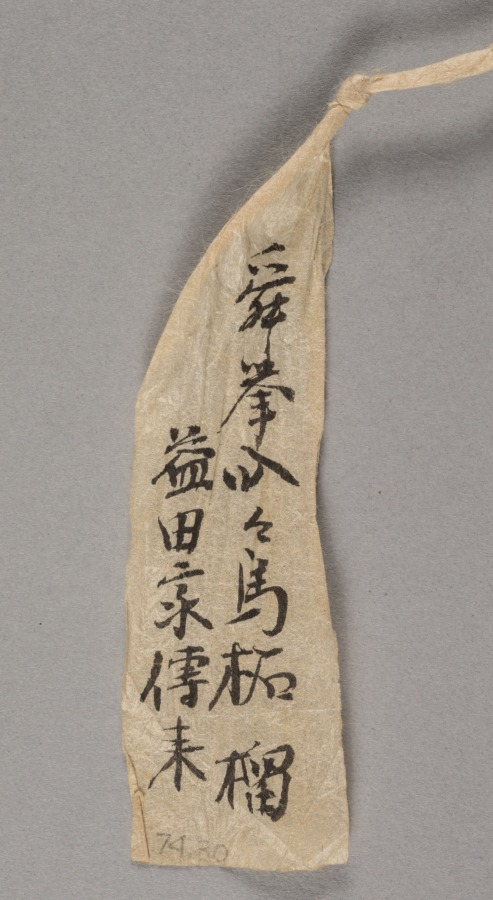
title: Crow on a Pomegranate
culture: Japan, Muromachi period (1392–1573)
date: 1500s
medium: hanging scroll; ink on paper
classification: Painting